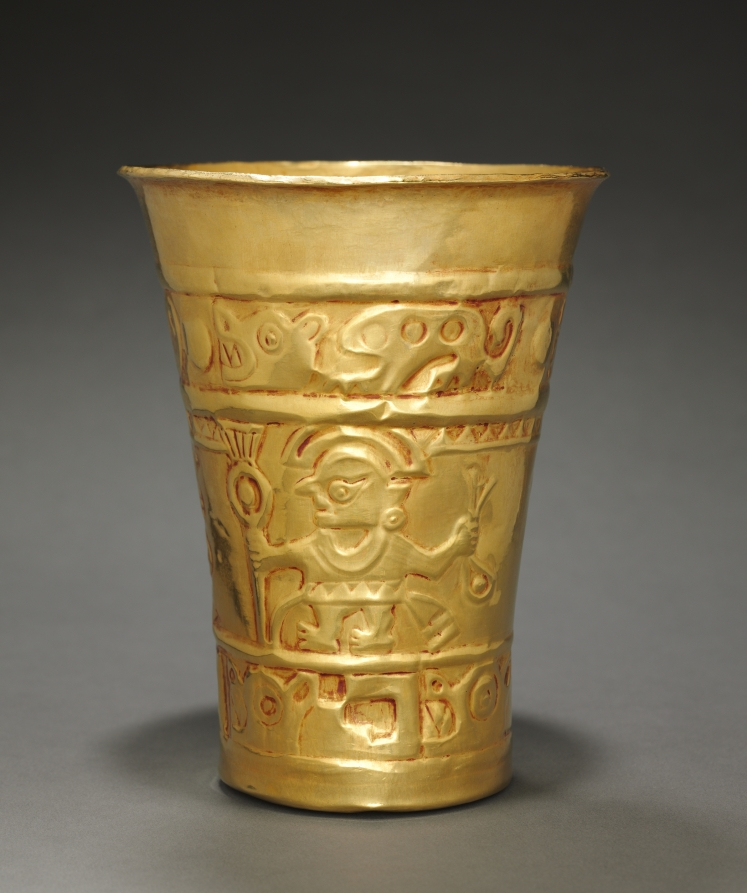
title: Beaker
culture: Peru, North Coast, Sicán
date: c. 800–1370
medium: hammered and embossed gold alloy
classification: Metalwork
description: Profile figures are unusual in Sicán metal beakers. The presence of such figures is one reason the museum is undertaking research to determine whether this vessel is authentic.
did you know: Embossed in the central band of this cup are warriors carrying clubs and slings.